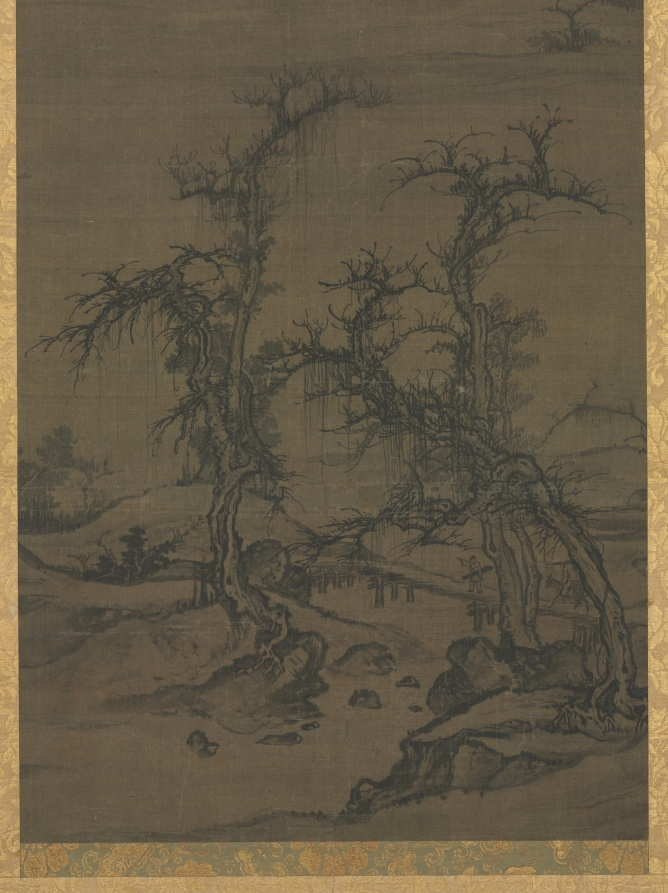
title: Carrying a Qin on a Visit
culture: China, Yuan dynasty (1271-1368)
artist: attributed to Luo Zhichuan (Chinese, active 1280s–1320s)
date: 1271–1368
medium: hanging scroll (now paneled), ink on silk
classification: Painting